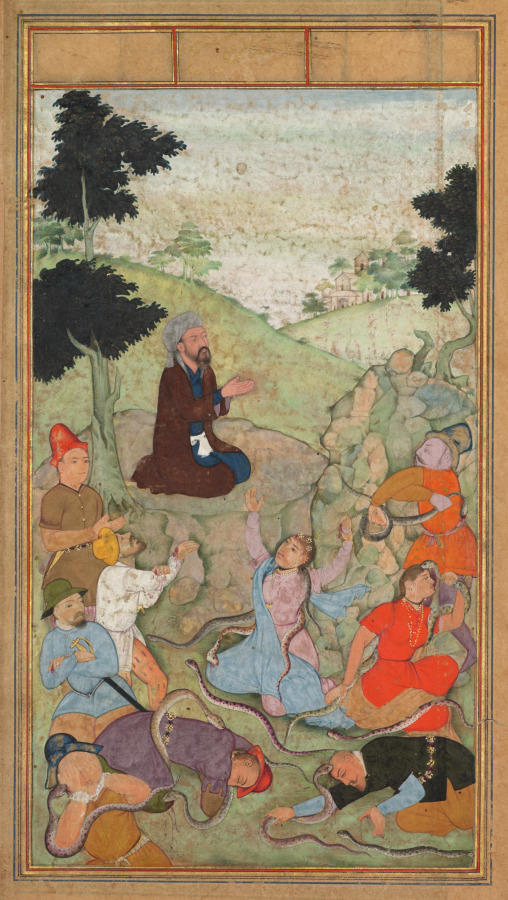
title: Moses praying to end the serpents’ attack on the Israelites (folio 63 verso), from a Mirror of Holiness (Mir’at al-quds) of Father Jerome Xavier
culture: Mughal India, Allahabad, made for Prince Salim (1569–1627)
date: 1602–4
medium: Gum tempera, ink, color, and gold on paper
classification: Manuscript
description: After the Israelites complained about the difficulties of their journey out of Egypt, God punished them for their lack of gratitude by sending snakes to bite and plague them. Apparently reveling in the brutality of the scene, the artist shows men and women alike being savaged by snakes, one of whose tail slithers over the rulings of the right margin. An Israelite woman raises her hands and pleads with Moses to help them, promising repentance, and he intercedes on their behalf. Father Jerome used this episode to demonstrate how repentant believers merit salvation.